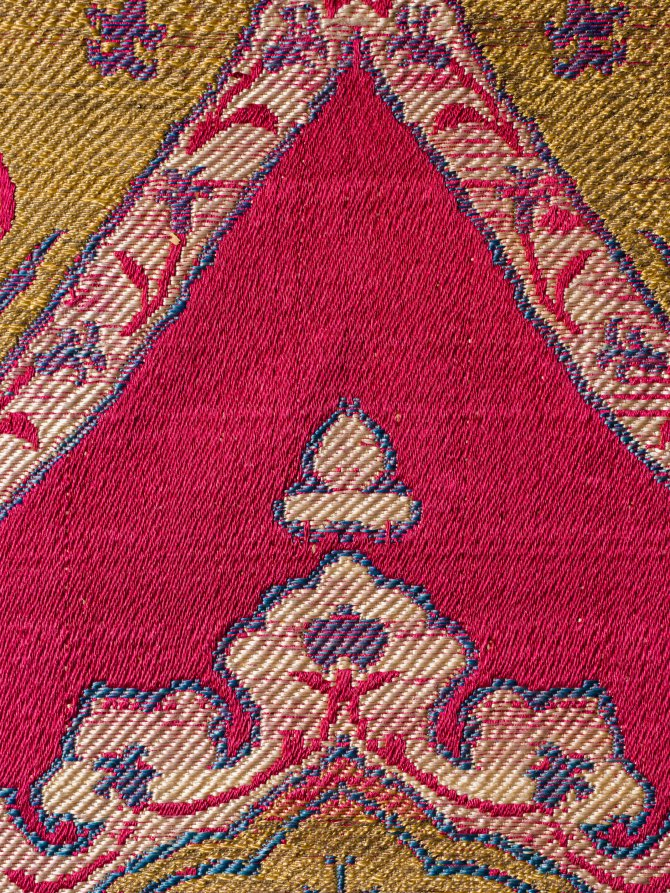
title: Lampas with floral medallions in ogival lattice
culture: Turkey, Istanbul or Bursa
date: 1550–75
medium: Silk and gilt-metal thread; lampas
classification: Textile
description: This signature Turkish brocaded silk has a classic elegance associated with the artistic height of the 1500s. The prominent golden medallions and ogival (curved) lattice contrast with exceptionally delicate Turkish flowers—tulips, roses, carnations, and hyacinths—which all grow on a single vine. The symmetrical design and two complete medallions with lattices across the width are typical Turkish features of fine brocaded silks. Its original function is uncertain. Possibly it was intended for an imperial kaftan, a garment consisting of a long gown with sleeves reaching below the hands, examples of which are preserved in the Topkapi Palace in Istanbul, the imperial center of the vast and wealthy Ottoman Empire.